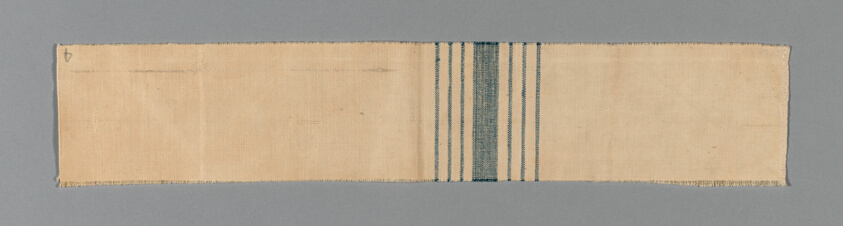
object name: Textile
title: Fragment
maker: United States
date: early 19th century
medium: Sample of stripe and check patterns of blue, white and tan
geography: United States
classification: textile; weaving